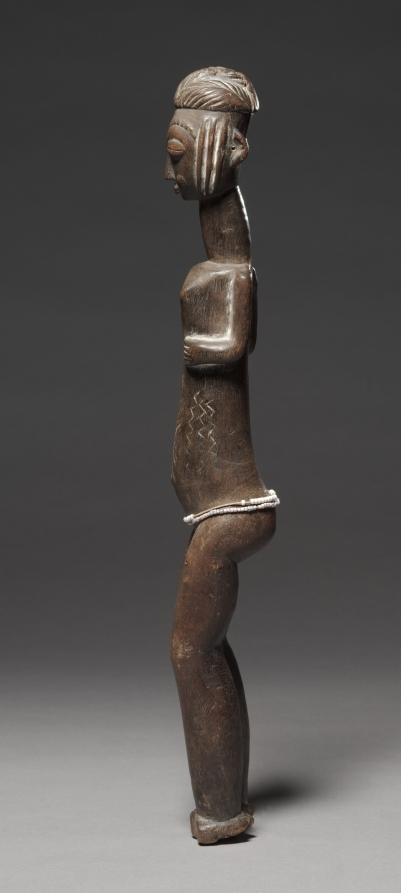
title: Female Figure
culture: Africa, West Africa, Côte d'Ivoire, possibly Bondoukou region, unknown maker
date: late 1800s–early 1900s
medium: Wood, paint, glass beads, and natural fiber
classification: Sculpture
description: An artistic melting pot, the Bondoukou region in northeastern Côte d’Ivoire near the border with Ghana is inhabited by several ethnic groups whose cultures and artistic styles often intermingle. This figure’s rounded shapes and delicate surface decoration––which seem to imitate body scarifications––closely resemble the style of Baule carvings. The figure’s meaning and function remain a mystery.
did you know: Artworks from different regions traveled across Africa; while found in Wenchi, Ghana, this figure was made in nearby Côte d'Ivoire.